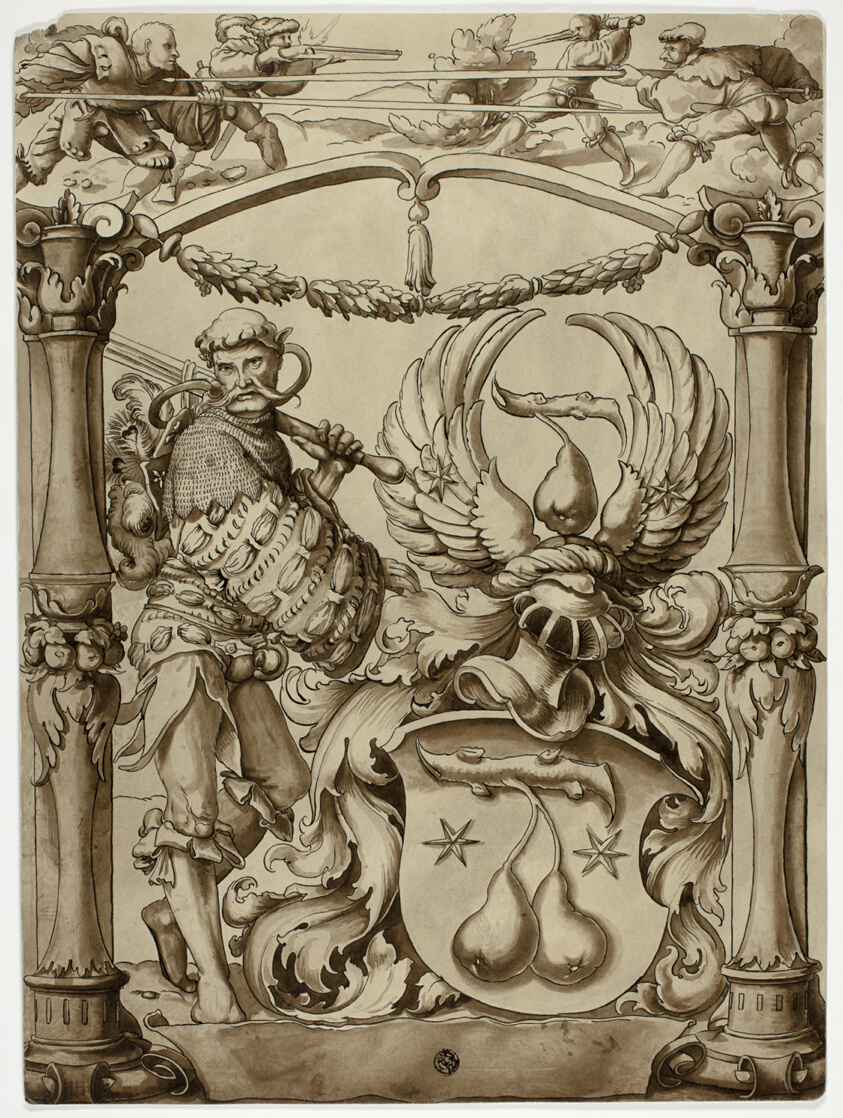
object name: Drawing and Watercolor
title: Design for Swiss Heraldic Arms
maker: After Hans Holbein, the younger; German, 1497-1543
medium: Pen and black ink and brush and brown ink and brown wash on ivory wove card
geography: Germany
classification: pen and ink drawings; brush and wash; drawings (visual works); prints and drawing; paper